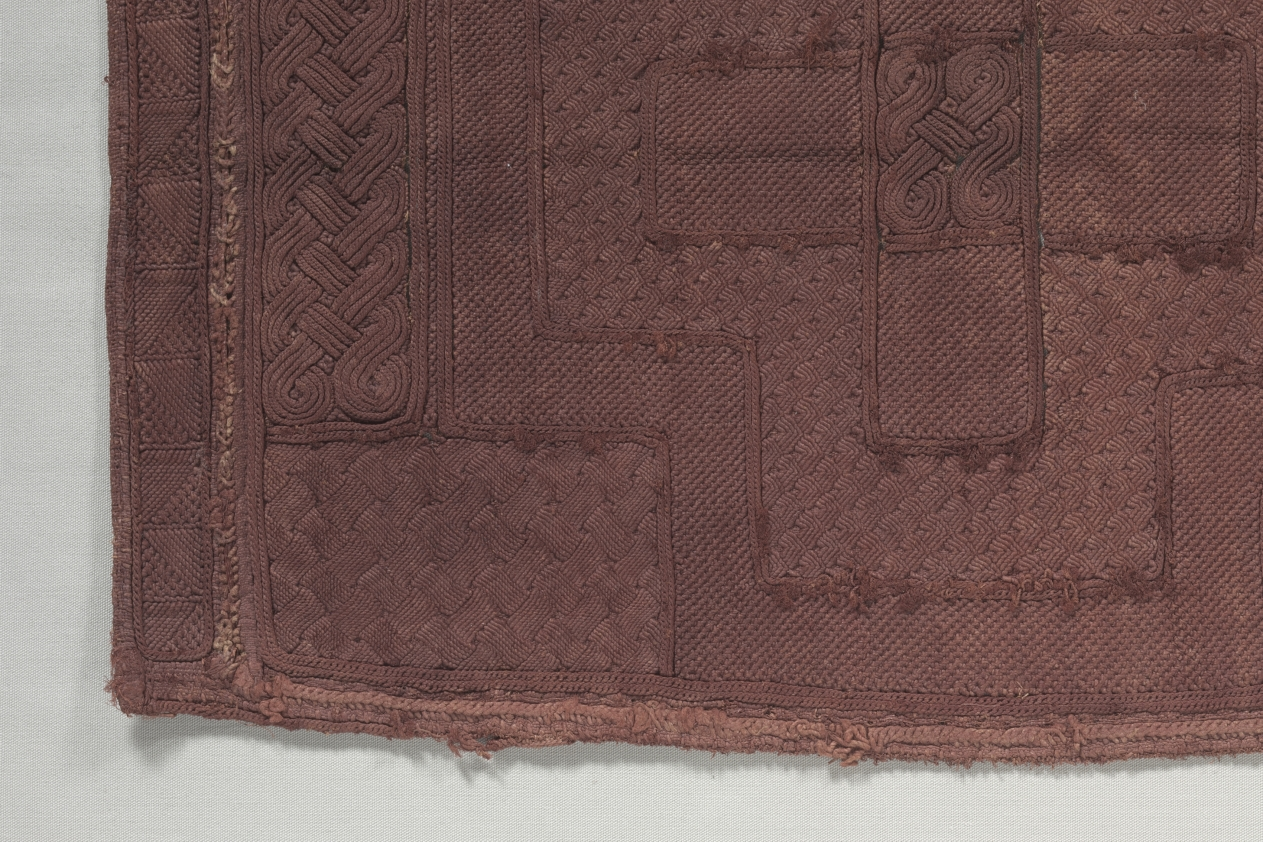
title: Fragment of Woman's overskirt (ncaka)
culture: Africa, Democratic Republic of the Congo, Kuba makers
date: late 1800s–early 1900s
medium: Raffia and tukula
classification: Garment